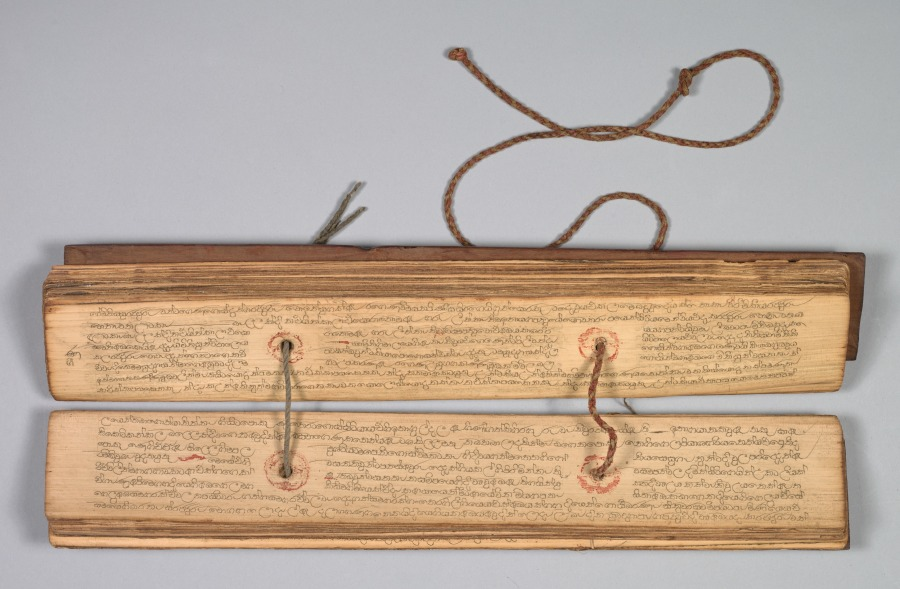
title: Buddhist Manuscript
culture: Sri Lanka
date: c. 1700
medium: Covers: Gum tempera on wood; pages: charcoal on palm leaves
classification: Manuscript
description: Palm leaf material is still used for manuscripts in Sri Lanka. The palm leaves are prepared first by boiling them, drying them in the sun, and then rubbing them with oils. Scribes then use a metal stylus to incise the text. Then charcoal powder is wiped across the pages, filling in only the inscribed lines.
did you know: The text is written in Sinhalese script.